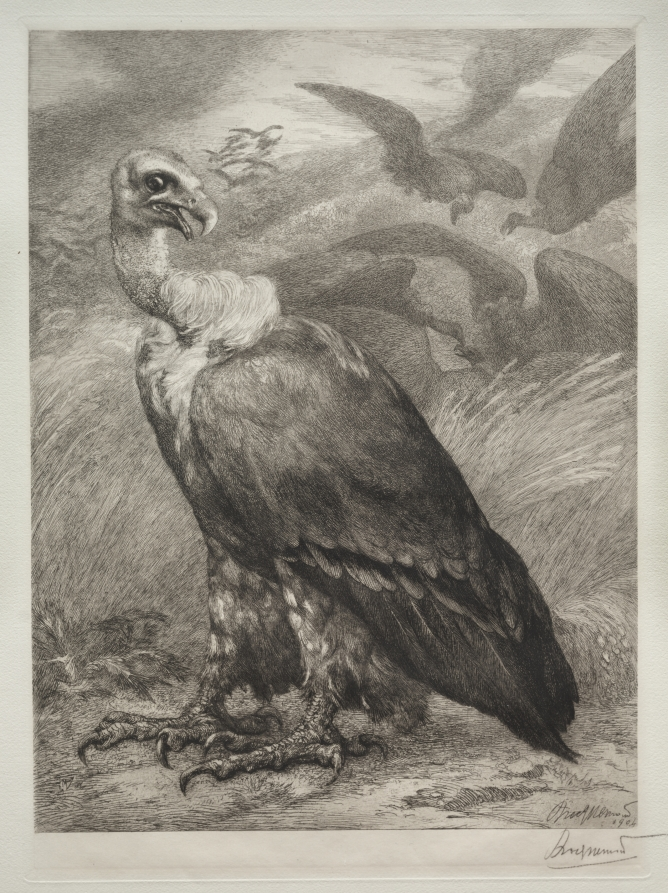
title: The Vulture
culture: France, 19th century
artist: Félix Bracquemond (French, 1833–1914)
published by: Emil Dolot (Société des amis de l'estampes français)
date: 1904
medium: etching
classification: Print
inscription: signed lower right, in black crayon, Bracquemond inscribed, lower left margin, letterpress, Imprimé pour M. Emil Dolot